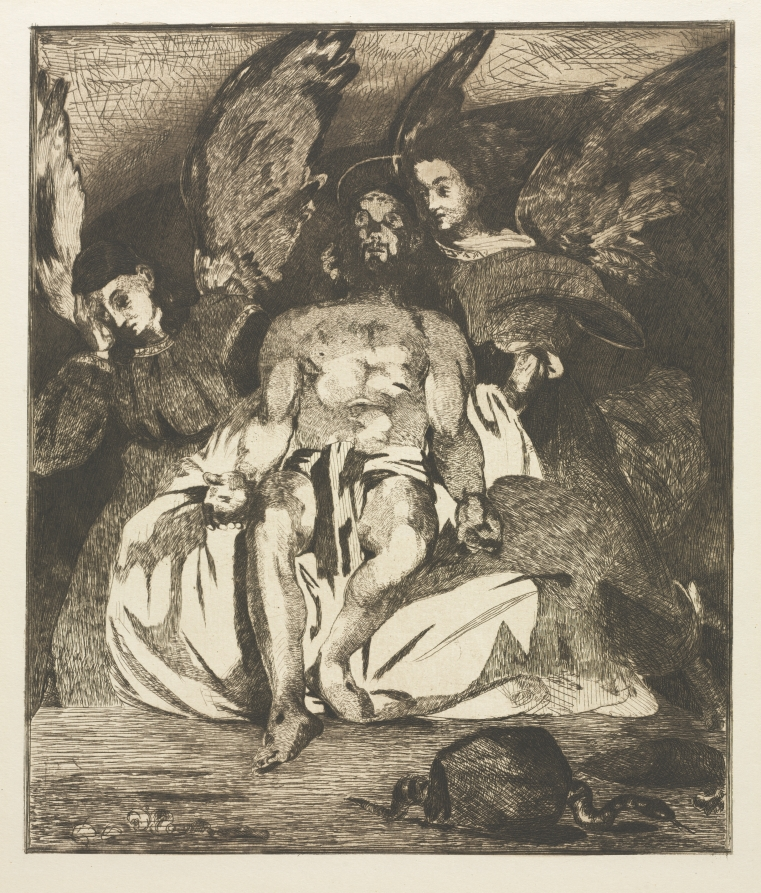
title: The Dead Christ with Angels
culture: France, 19th century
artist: Édouard Manet (French, 1832–1883)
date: 1866–67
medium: etching and aquatint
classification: Print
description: Edouard Manet often reinterpreted his own paintings as prints, using various techniques to bring his work to a broader audience. Here, he relied on a combination of aquatint and repeating marks to realistically suggest Christ’s lifeless body in the tomb where he was placed following his crucifixion. The figure’s vacant gaze and the deep shadows behind him led critics to deride the work as grotesque in its realism. The etching was the largest Manet made and, perhaps as a result, only a few impressions—including the one seen here—were made from the plate.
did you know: This etching was the largest that Édouard Manet made.